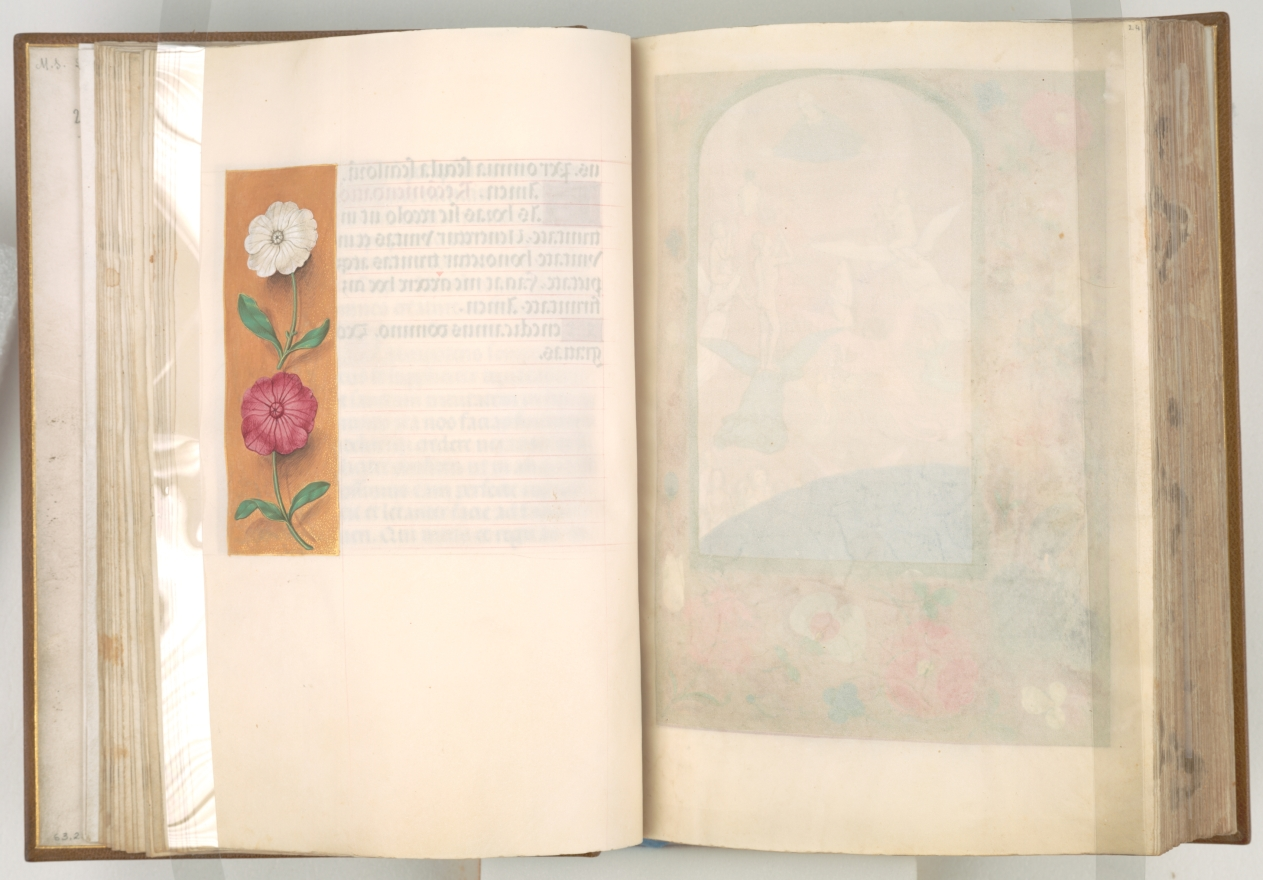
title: Hours of Queen Isabella the Catholic, Queen of Spain: Fol. 23v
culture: Flanders, Ghent and Bruges, late 15th century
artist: Master of the First Prayerbook of Maximillian (Flemish, c. 1444–1519)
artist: and Associates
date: c. 1500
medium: ink, tempera, and gold on vellum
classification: Bound Volume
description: This manuscript was illuminated by a circle of at least five highly organized manuscript painters active in the Flemish cities of Ghent and Bruges. The principal illuminator was Alexander Bening, who painted the majority of the book's miniatures. Manuscripts produced by this circle of artists are renowned for the decoration of their borders, which typically feature a rich variety of realistically-painted flowers, birds, and butterflies. This prayer book, called a book of hours, was intended not for a cleric, but for the private devotions of a lay person-in this case, Isabella the Catholic, Queen of Spain (1451-1504). Isabella's coat of arms embellishes the book's frontispiece. It is unlikely that the book was commissioned by the Queen herself; rather, she probably received it as a diplomatic gift from someone courting her patronage, perhaps Cardinal Francisco Jimenez de Cisneros. A Franciscan friar, Jimenez was dependent upon Isabella for his advancement, first to the post of Queen's confessor in 1492, and then to Archbishop of Toledo in 1495.